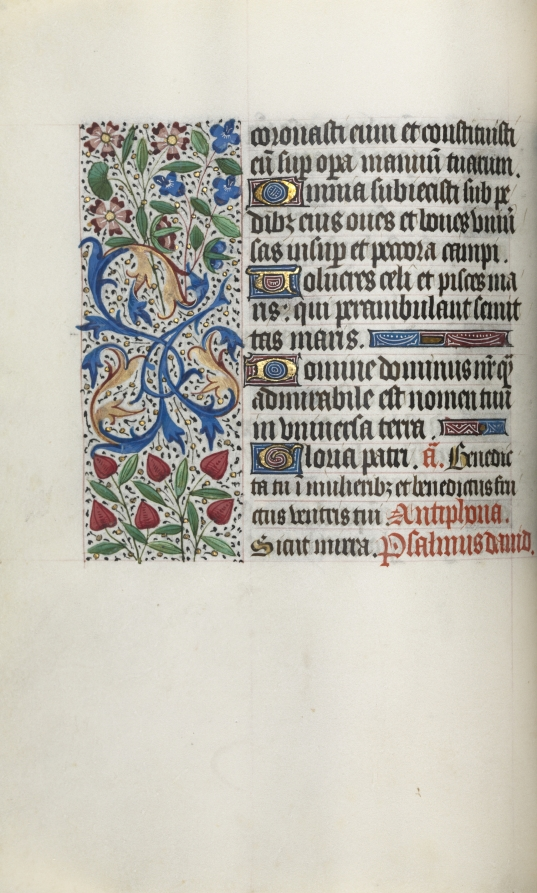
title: Book of Hours (Use of Rouen): fol. 31v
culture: France, Rouen, 15th century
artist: Master of the Geneva Latini (French, active Rouen, 1460–80)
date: c. 1470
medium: ink, tempera, and gold on vellum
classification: Bound Volume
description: In the late 1400s and early 1500s Rouen was an established and important center of book production. The city’s cathedral had a wealthy chapter that spent large sums of money to commission books and to maintain its extensive library. The stationers and booksellers would have likely been concentrated in or near the cathedral precinct. This artist, named after a manuscript now in Geneva, was Rouen’s principal illuminator during the second half of the 1400s.